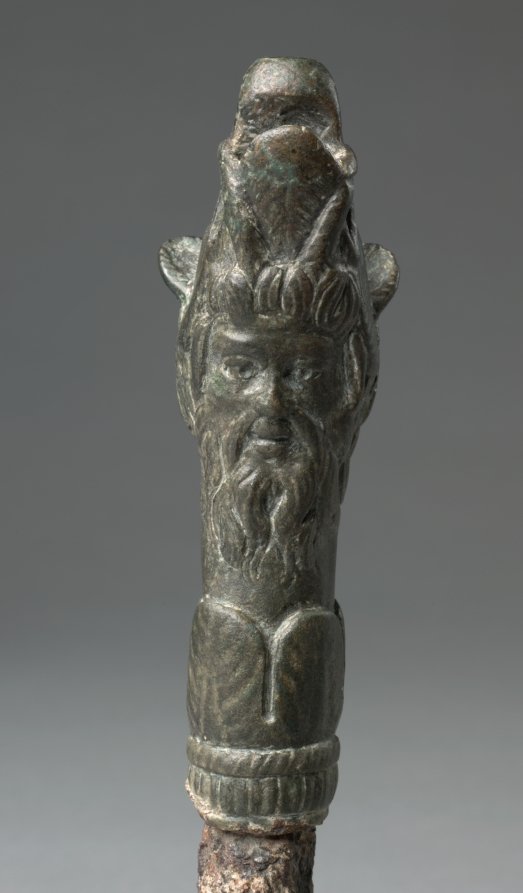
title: Key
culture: Italy, Roman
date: 1–100 CE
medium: iron tang, bronze handle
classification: Metalwork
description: Cleverly designed with an iron bit attached to a bronze handle, this key can be admired from all angles. While the handle terminates in the head of a ferocious boar, farther down are back-to-back heads of Mercury—his wings formed from the ears of the boar—and his goat-legged, horned son, Silvanus (also known as Pan). Given the rustic nature of the heads, scholars have suggested that the key might once have unlocked a country villa.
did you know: The bronze handle of this key combines three heads: of a boar, Mercury, and Silvanus.